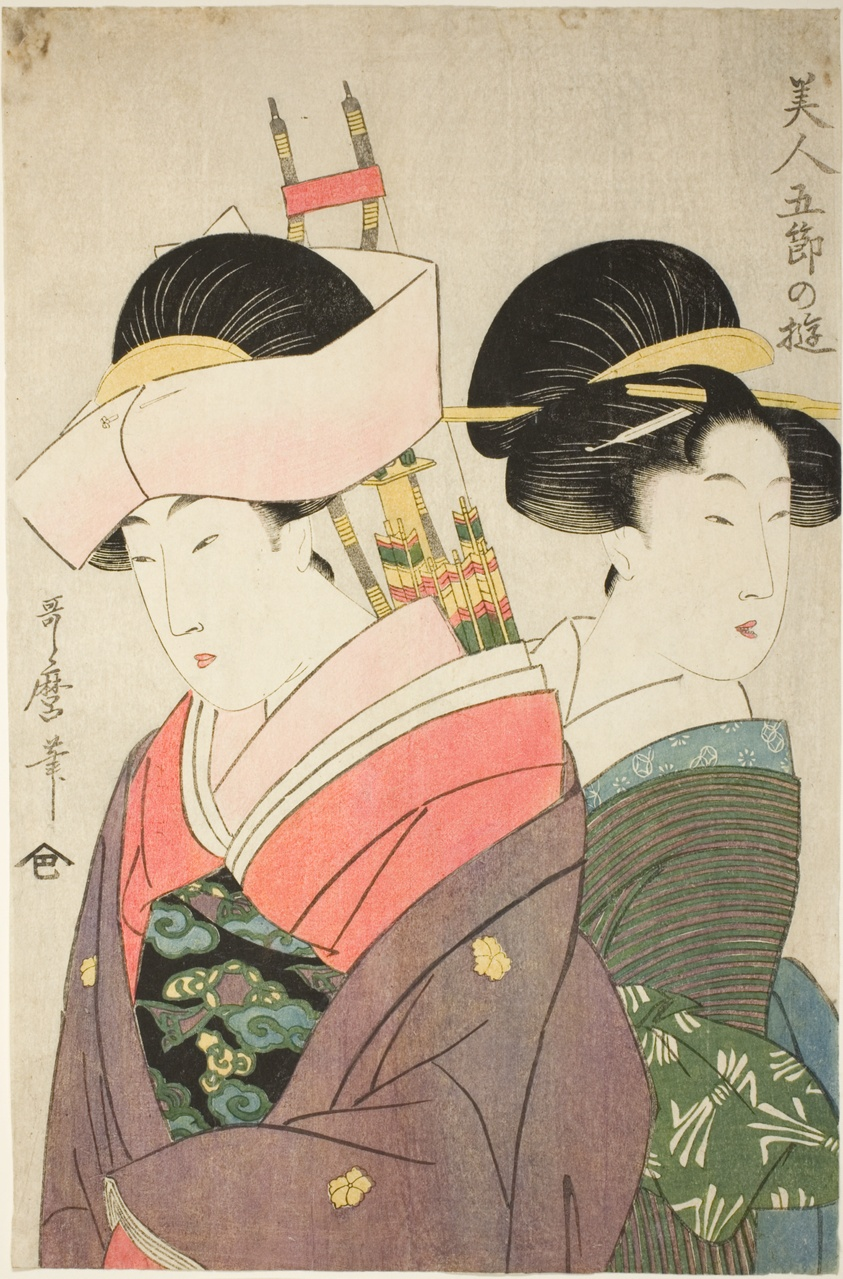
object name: Print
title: Beauty and Attendant on New Year’s Day, from the series “Pleasures for Beauties on the Five Festival Days" ("Bijin gosetsu no asobi")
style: Japanese (culture or style)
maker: Kitagawa Utamaro 喜多川 歌麿; Japanese, 1753 (?)-1806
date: c. 1800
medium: Color woodblock print; oban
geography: Japan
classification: woodblock print; print; asian art